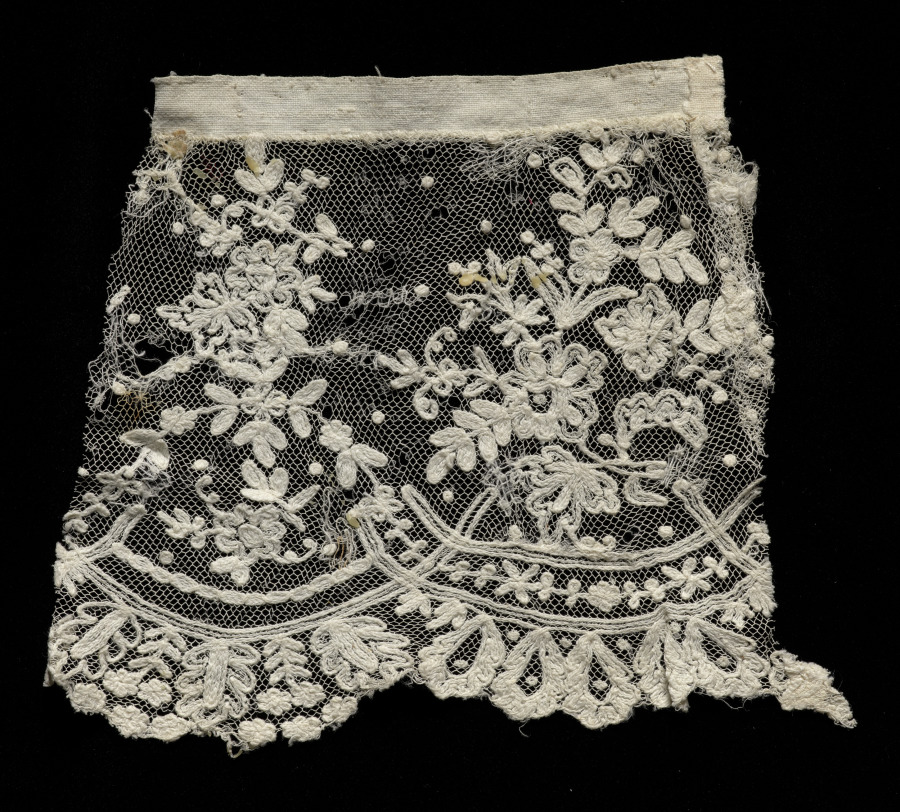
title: Lace Fragment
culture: Spain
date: 1840s–50s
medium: Machine-made lace (embroidered net)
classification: Lace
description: While made in Spain, this lace fragment copies a Brussels design. It is of a type usually referred to as Limerick lace, because it was often made in Ireland.